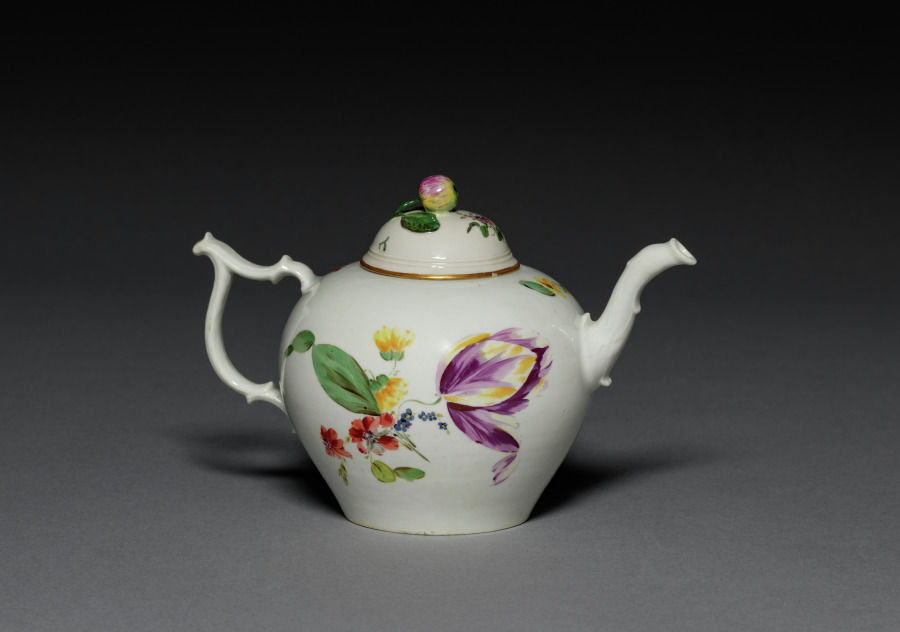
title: Teapot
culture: Germany, late 18th century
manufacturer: Kloster-Veilsdorf Porcelain Factory (German)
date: late 1700s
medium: porcelain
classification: Ceramic